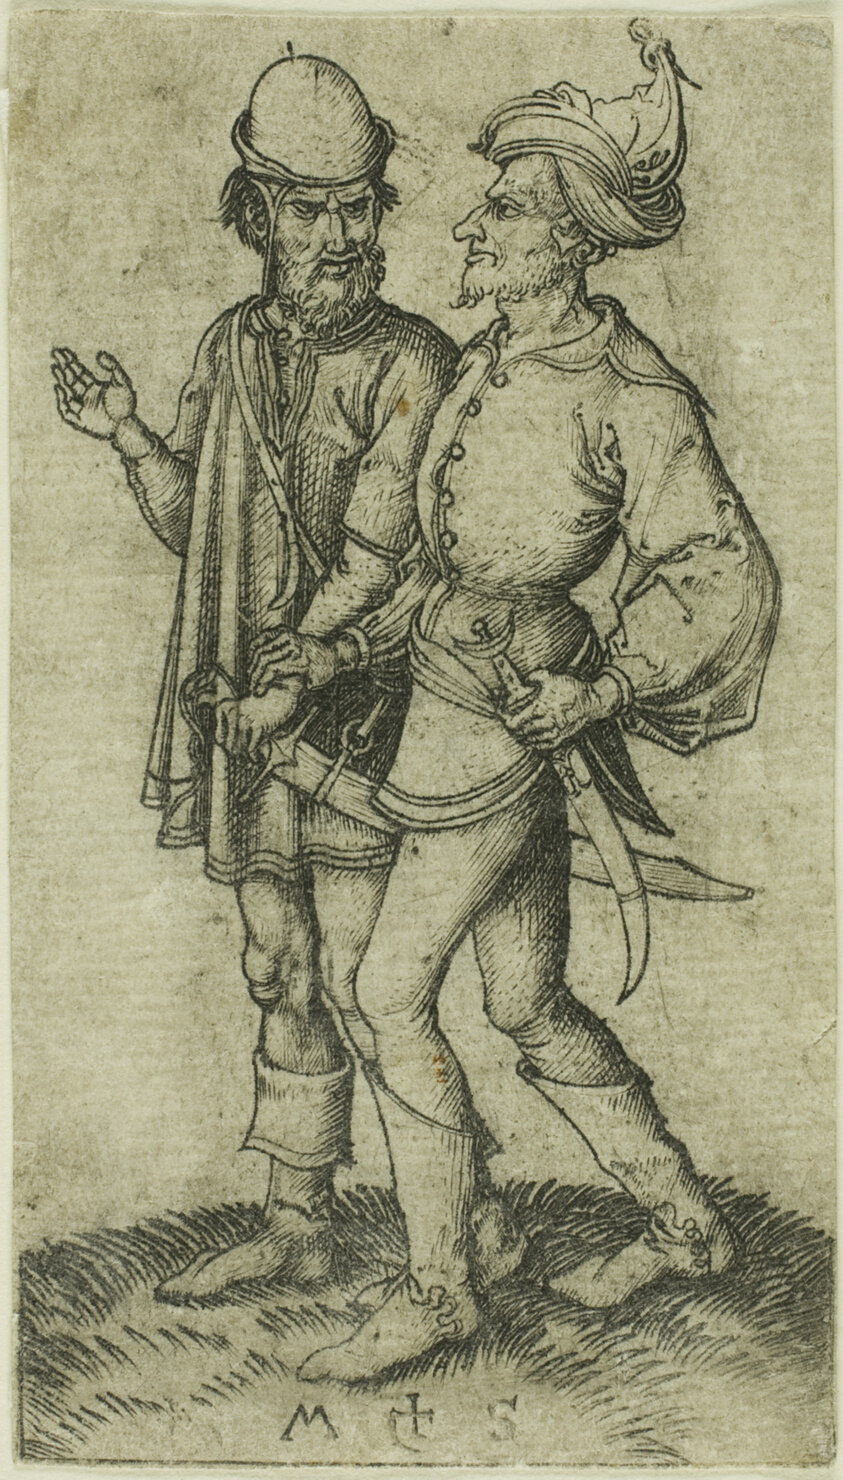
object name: Print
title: Two Moors in Conversation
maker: Martin Schongauer (German, c. 1430/50-1491)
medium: Engraving on paper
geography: Germany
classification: engraving; print; prints and drawing